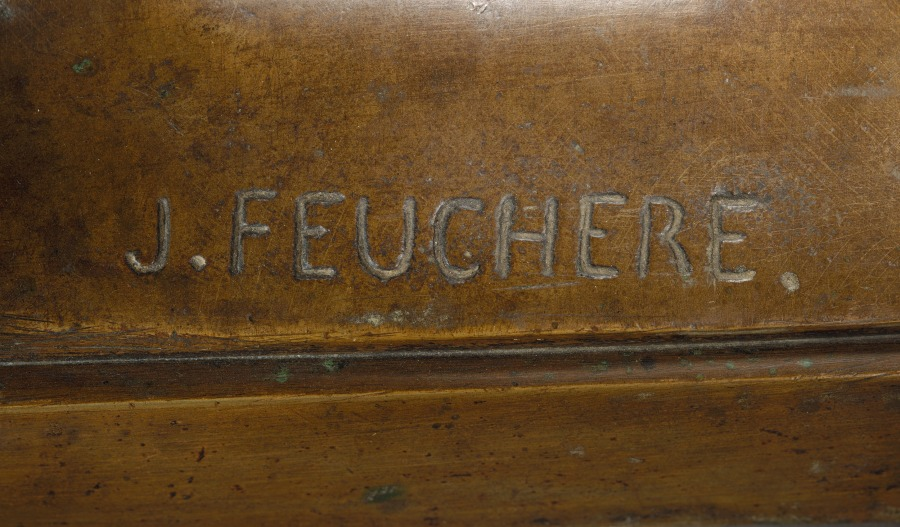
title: Amazon Taming a Horse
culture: France, 19th century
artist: Jean-Jacques Feuchère (French, 1807–1852)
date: c. 1840–1843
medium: bronze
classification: Sculpture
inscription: signed on base: "J. FEUCHÈRE"